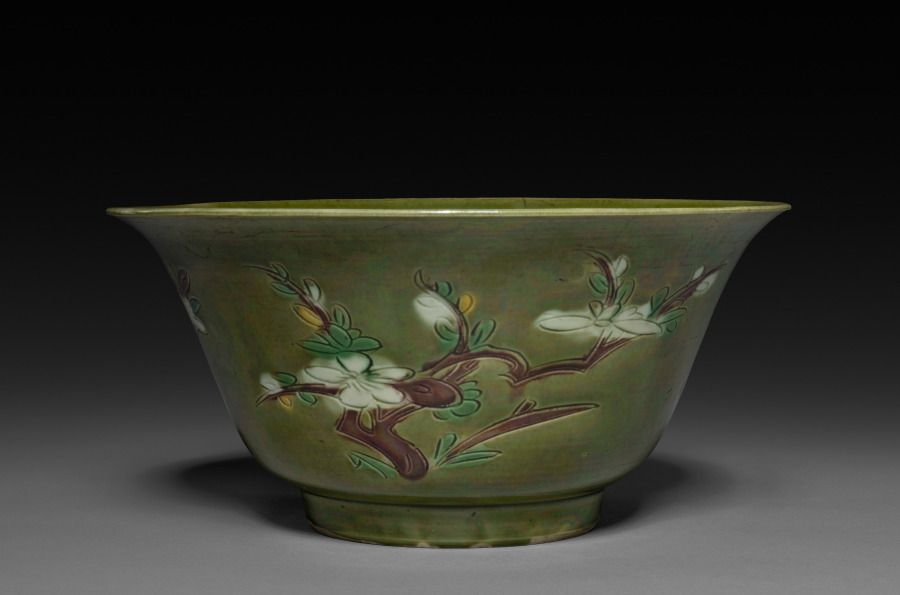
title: Brinjal Bowl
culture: China, Ming dynasty (1368–1644) to Qing dynasty (1644–1911)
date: 1368–1644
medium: white porcelain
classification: Ceramic